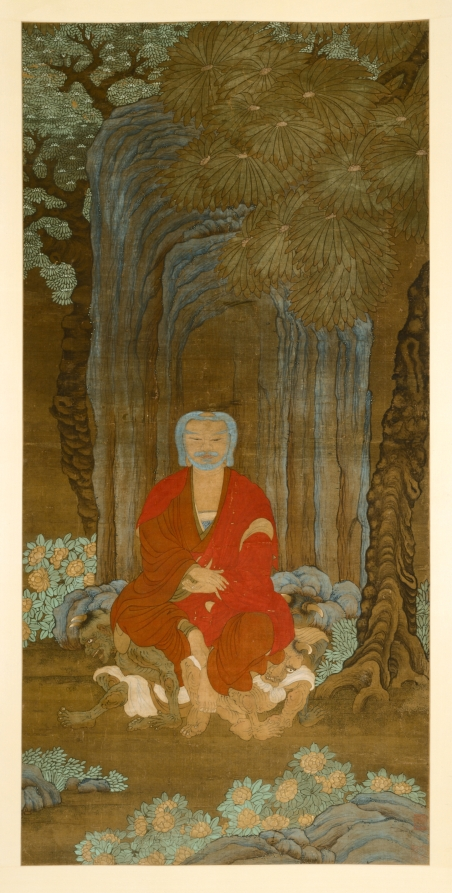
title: Shakyamuni under the Bodhi Tree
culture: China, Ming dynasty (1368–1644)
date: 1600–1650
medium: hanging scroll; ink and color on silk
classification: Painting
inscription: Artist's seal(?): Ta-fang-chih. 1 additional seal of Chiao Ping (dates unknown)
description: The historical Buddha Shakyamuni is seated in meditative posture upon the backs of three demons under the bodhi tree, where he achieved enlightenment. All three demons have horns like devils, and two have green skin. While they accommodate the Buddha, his weight seems to keep them under control. Since the Buddha’s hands do not conform to any accepted gesture, the specific religious event portrayed is unclear.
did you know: The blue-green style and grotesque goblins suggest an otherworldly sphere.